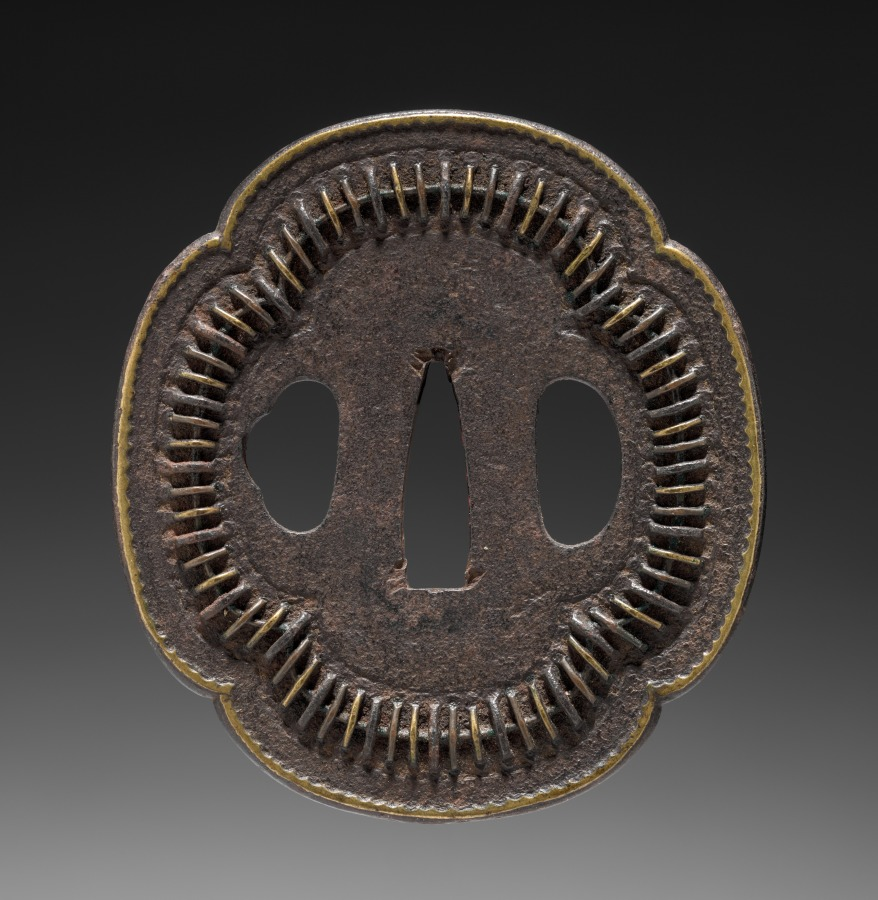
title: Sword Guard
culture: Japan, Edo period (1615–1868)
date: 1615–1868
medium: iron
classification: Arms and Armor